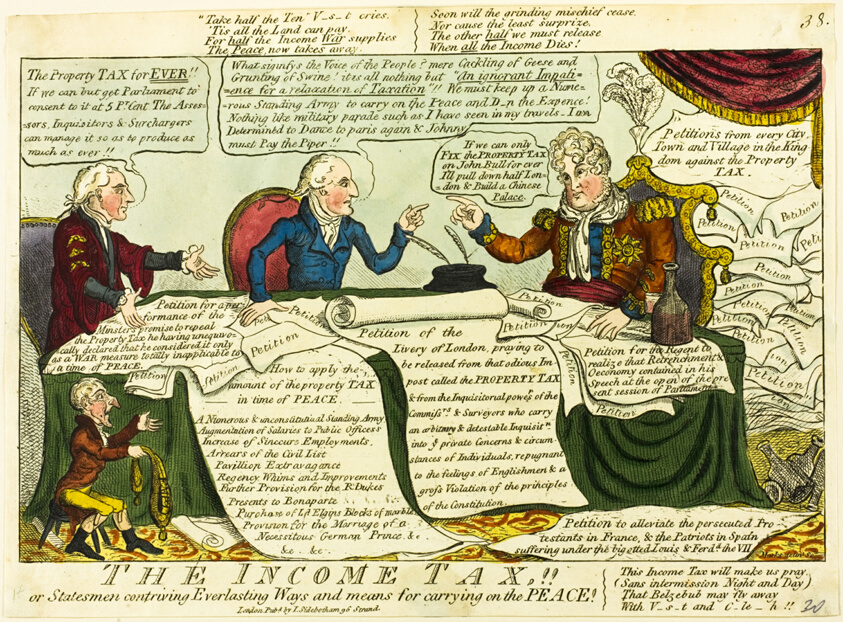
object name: Print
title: The Income Tax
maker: J. Lewis Marks (English, 1769–c. 1832)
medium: Hand-colored etching on cream wove paper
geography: England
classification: etching; print; prints and drawing